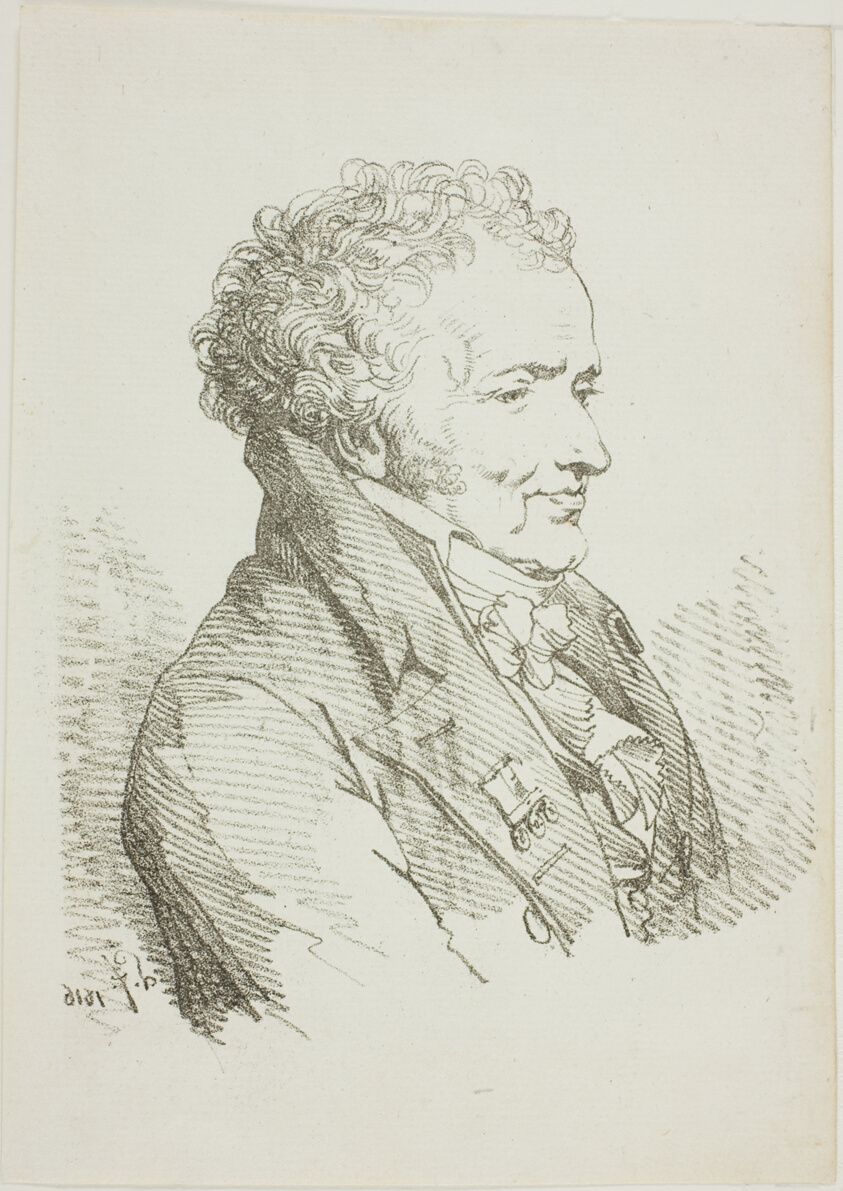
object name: Print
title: Portrait of Vivant-Denon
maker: L. F. Laurent (French, 19th Century)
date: 1816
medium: Lithograph in black on ivory laid paper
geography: France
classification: lithograph; print; prints and drawing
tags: portraits